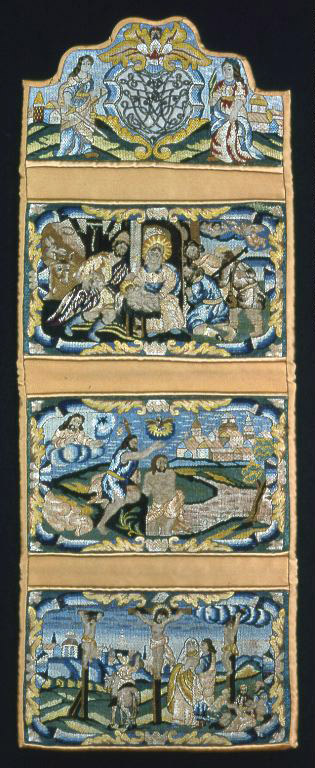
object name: Textile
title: Wall Pocket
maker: Switzerland or Germany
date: 17th century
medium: "Canvas" with paired threads, plain weave; embroidered with silk floss, metal thread would around a silk fiber core, in tent, alternating straight, outline, long, short and couching stitches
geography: Switzerland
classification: textile; needlework (visual works)